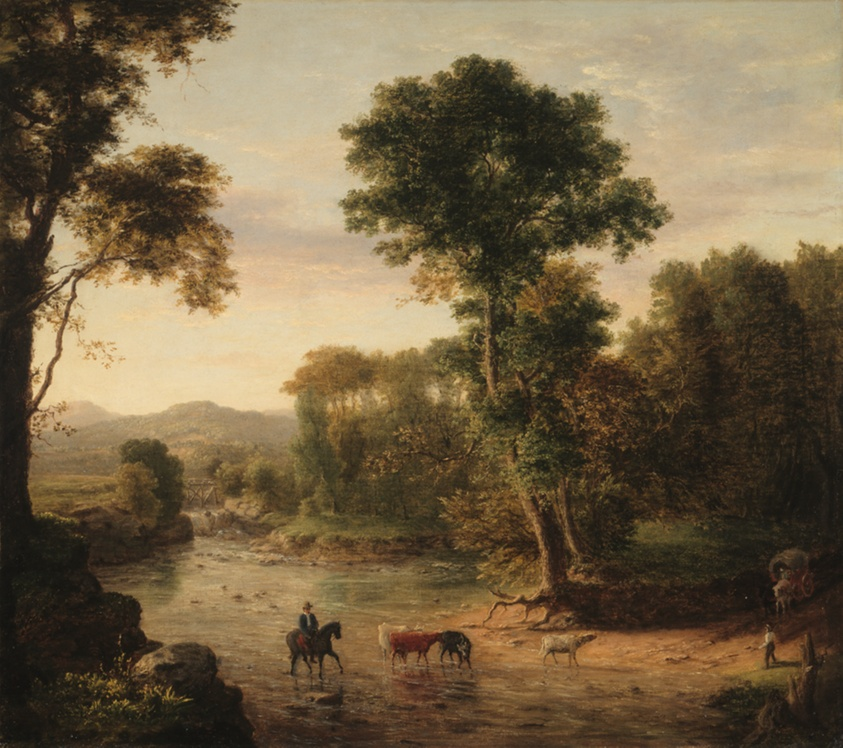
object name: Painting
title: Crossing the Ford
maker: George Inness (American, 1825–1894)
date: 1848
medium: Oil on canvas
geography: United States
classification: painting; american arts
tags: landscapes